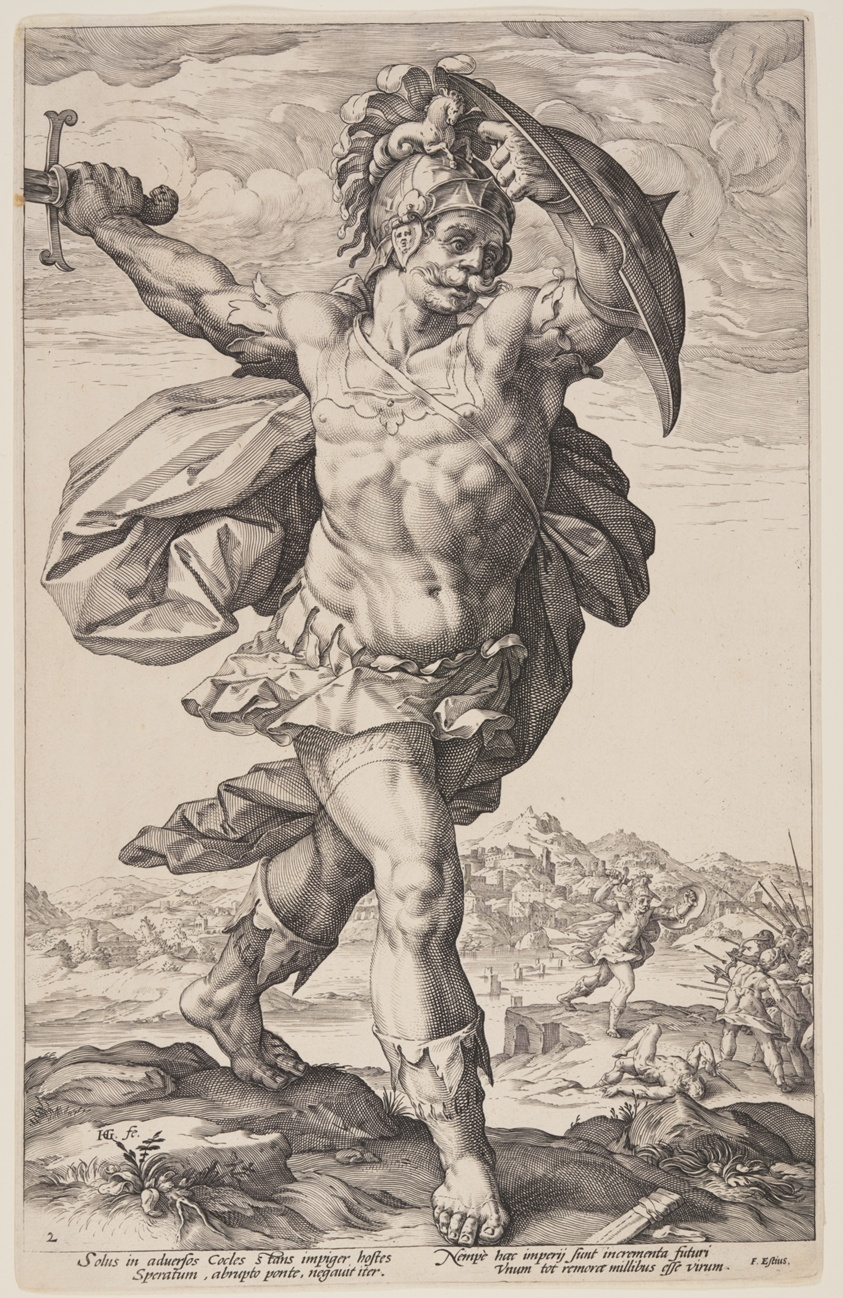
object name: Print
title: Horatius Cocles, from The Roman Heroes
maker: Hendrick Goltzius (Dutch, 1558–1617)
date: 1586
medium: Engraving on ivory laid paper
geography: Netherlands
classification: print; paper; prints and drawing; engraving